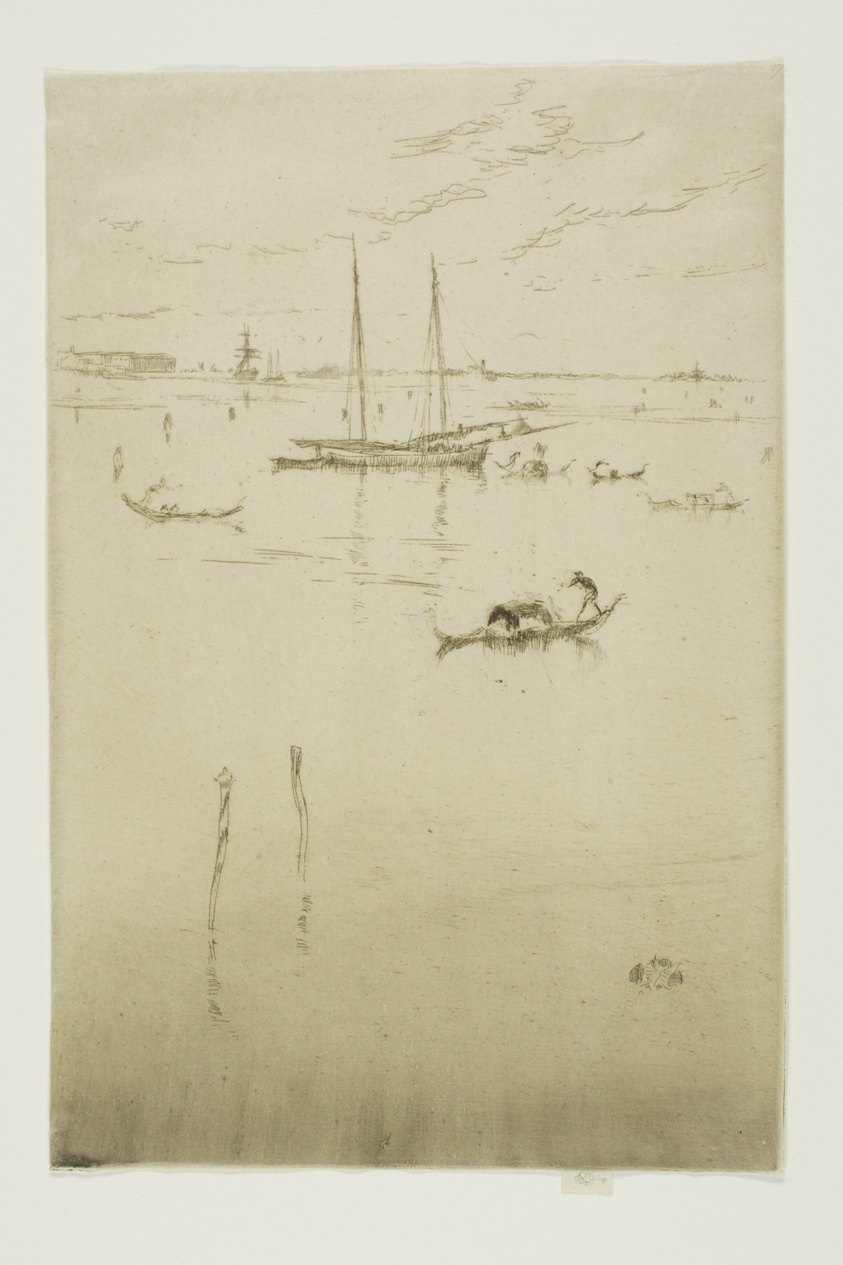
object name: Print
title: The Little Lagoon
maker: James McNeill Whistler (American, 1834-1903)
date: 1879/80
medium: Etching and drypoint with foul biting in black ink on cream paper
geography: United States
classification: etching; foul biting; print; prints and drawing; drypoint; paper